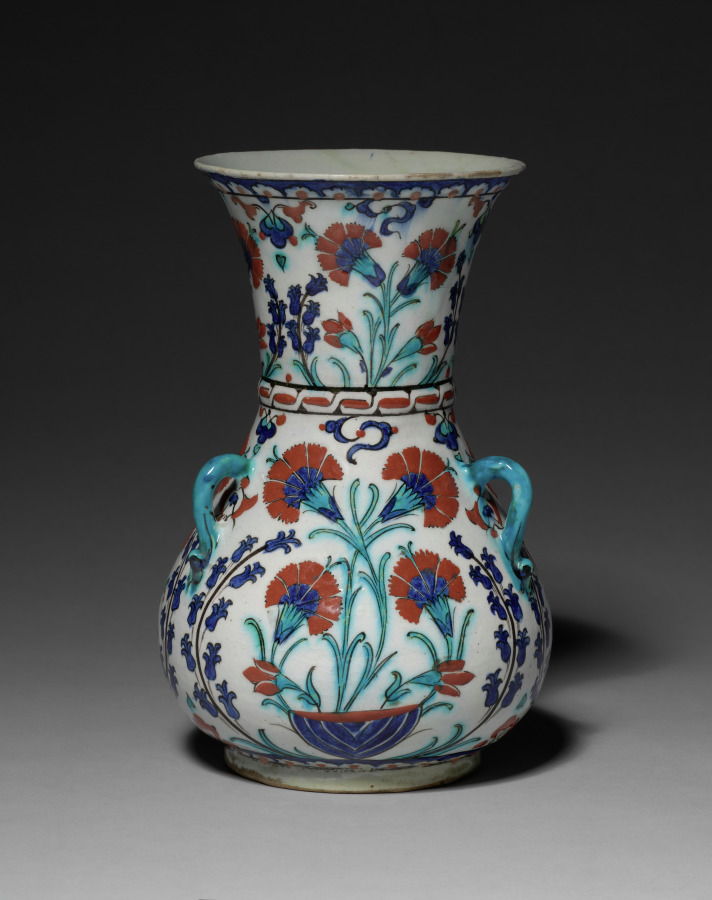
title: Mosque Lamp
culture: Turkey, Iznik, Ottoman period (1299–1922)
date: 1585–95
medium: Fritware with underglaze design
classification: Ceramic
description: Mosque lamps typically functioned as a lampshade, containing an oil lamp inside. Due to the opacity of this Ottoman lamp, it is likely that its primary function was not illumination. Instead, it would have been hung from chains in a mosque or mausoleum to add to the beauty of the space. This lamp is decorated with bright red carnations and blue hyacinths with additional floral and vegetal elements. The turquoise loops would have served for suspension from the ceiling. It is also possible that lamps like this were used as acoustic devices, softening the echo of prayer and discussion within the mosque’s halls.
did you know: Fritware is made of ground quartz, glass frit (partially fused glass), and a small proportion of fine white clay to approximate the light color and weight of Chinese porcelain.